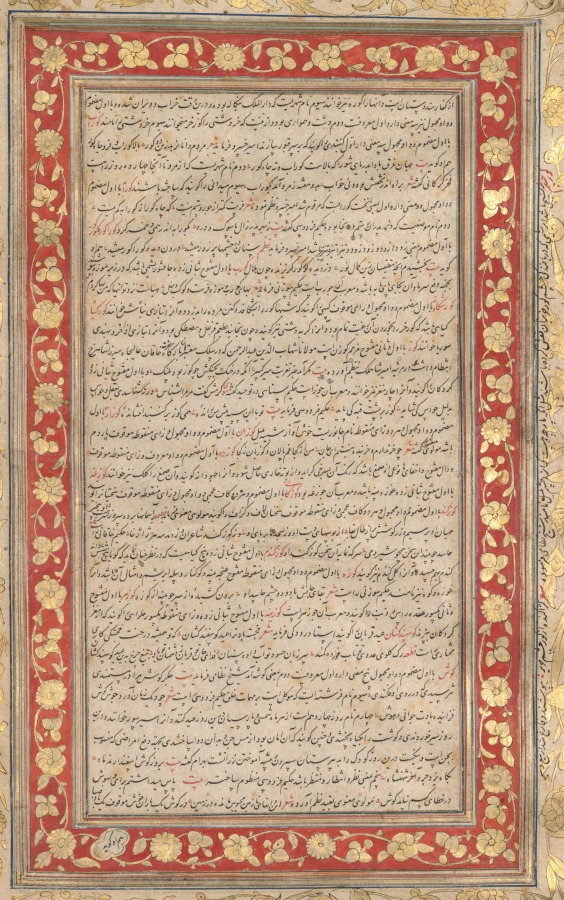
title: An Illuminated Folio from the Royal Manuscript of the Farhang-i Jahangiri (verso)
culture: Mughal India, court of Jahangir (1605–1627)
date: 1607–8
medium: Gum tempera, ink, and gold on paper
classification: Painting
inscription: Verso: “Gur” (name of a people in India) to “Gush” (morning east breeze, zephyr)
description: Farhang-i Jahāngīrī, one of the most complete and authoritative dictionaries of the Persian language, was compiled by Mir Jamal al-Din Husayn Inju. It took him 12 years to compile over 9,000 words with definitions and examples from verses by Persian poets. He was born in Shiraz, Iran, but lived most of his life in Agra, India, so the dictionary was named honor of the Mughal emperor Jahangir, who reigned from 1605 to 1627.